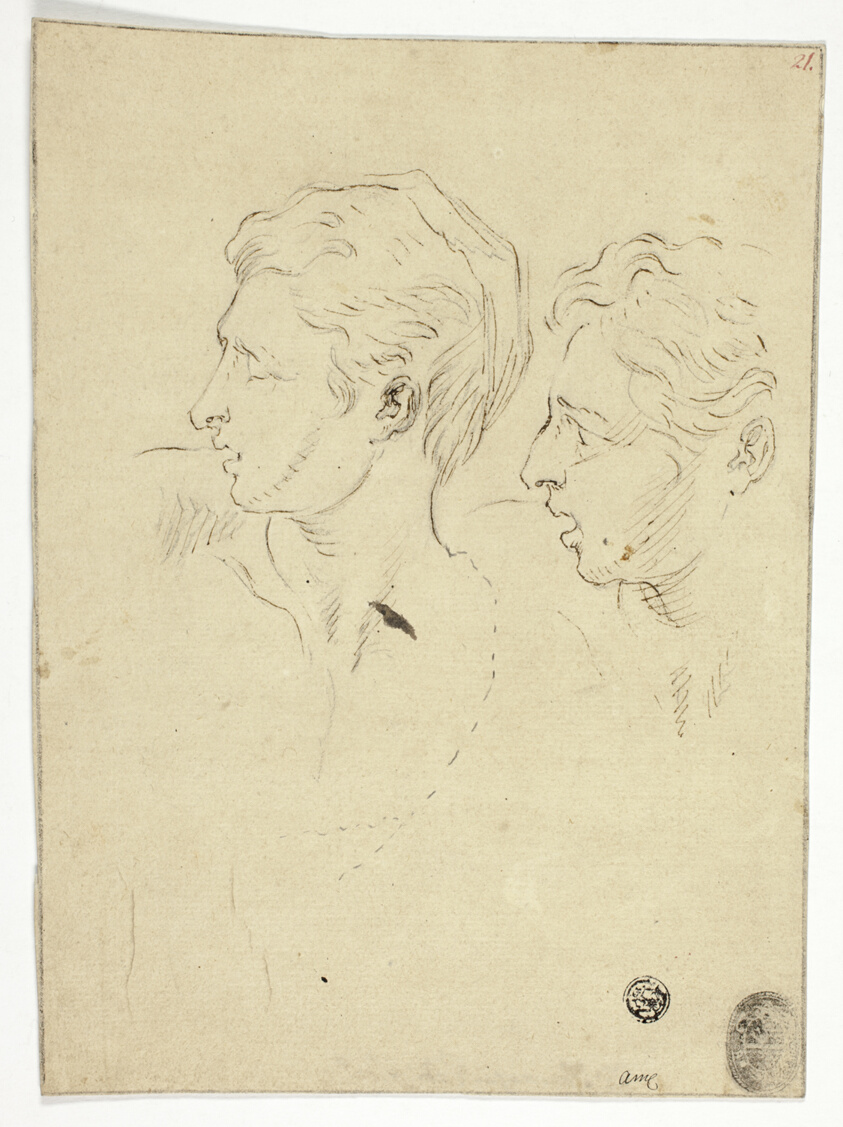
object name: Drawing and Watercolor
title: Sketch of Two Men Turning Left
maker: Unknown Artist; Italian, 17th century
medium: Pen and brown ink, over graphite, on tan laid paper, laid down on ivory wove paper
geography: Rome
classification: pen and ink drawings; drawings (visual works); prints and drawing